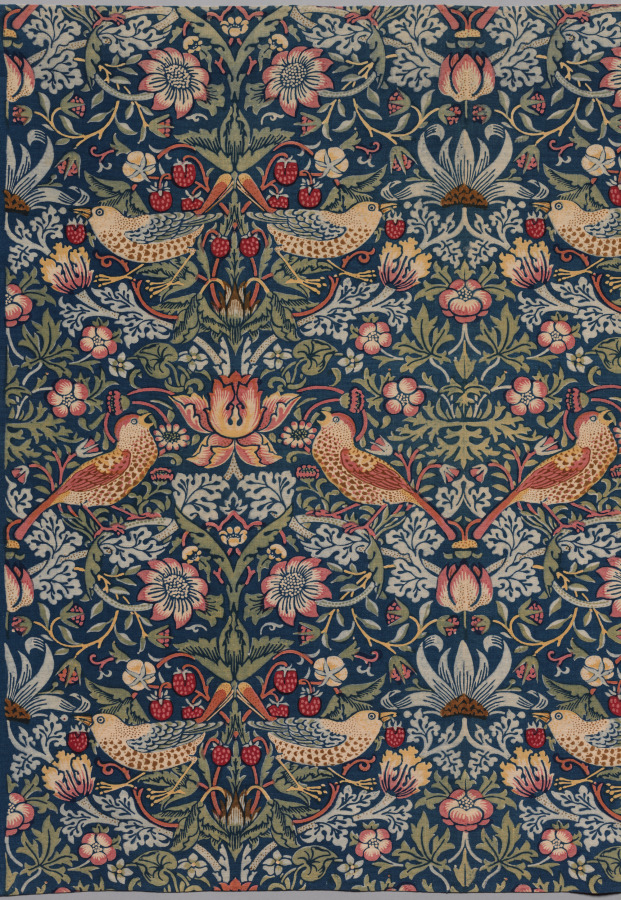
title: Strawberry Thief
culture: England, Merton Abbey, 20th century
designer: William Morris (British, 1834–1896)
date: c 1936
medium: plain weave cotton, discharge printed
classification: Textile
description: Perhaps the most recognizable of Morris’s textiles, Strawberry Thief celebrates the thrushes in Kelmscott Manor’s garden. May Morris remarked, “You can picture my Father going out in the early morning and watching the rascally thrushes at work on the fruit beds and telling the gardener who growls, ‘I’d like to wring their necks!’ that no bird in the garden must be touched.” With Strawberry Thief, Morris perfected the indigo-discharge process, which required the entire cloth to be dyed blue before it was bleached and block printed, in this case with more colors than any of his other textiles.